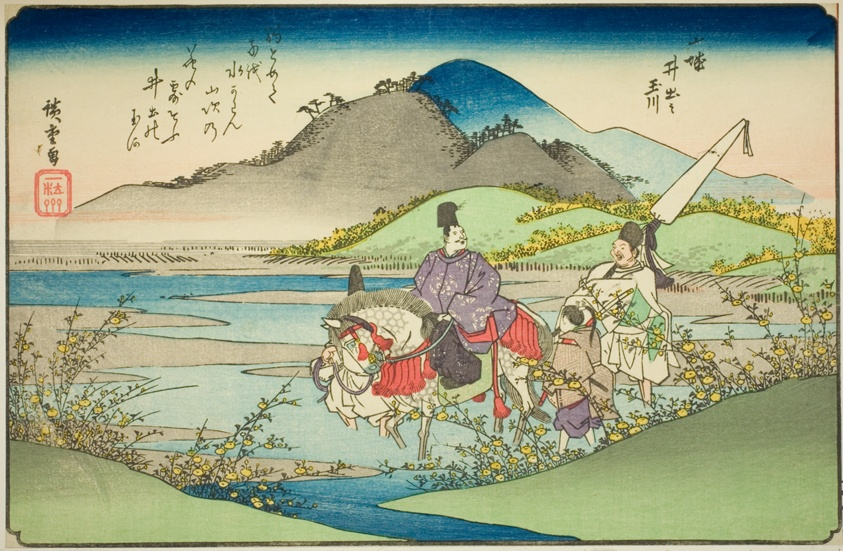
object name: Print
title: The Ide Jewel River in Yamashiro Province (Yamashiro Ide no Tamagawa), from the series "Six Jewel Rivers in Various Provinces (Shokoku Mu Tamagawa)"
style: Japanese (culture or style)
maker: Utagawa Hiroshige 歌川 広重; Japanese, 1797-1858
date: c. 1835/37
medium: Color woodblock print; oban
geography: Japan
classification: woodblock print; print; asian art